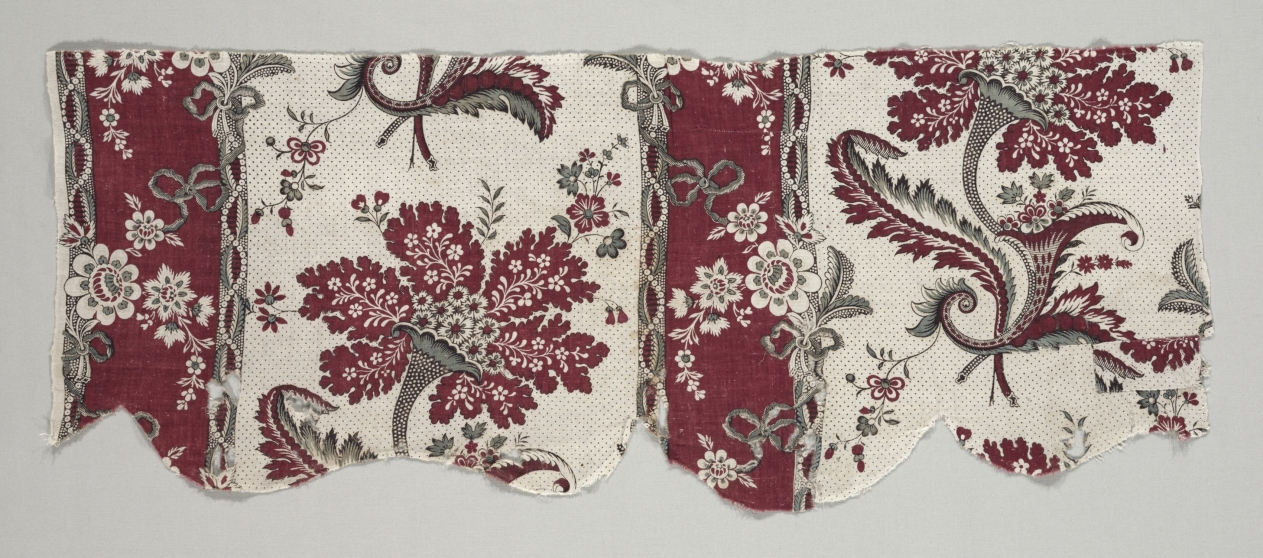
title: Strip of Woodblock Printed Cotton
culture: France, Beautiran, late 18th century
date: 1798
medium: woodblock print on cotton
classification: Textile